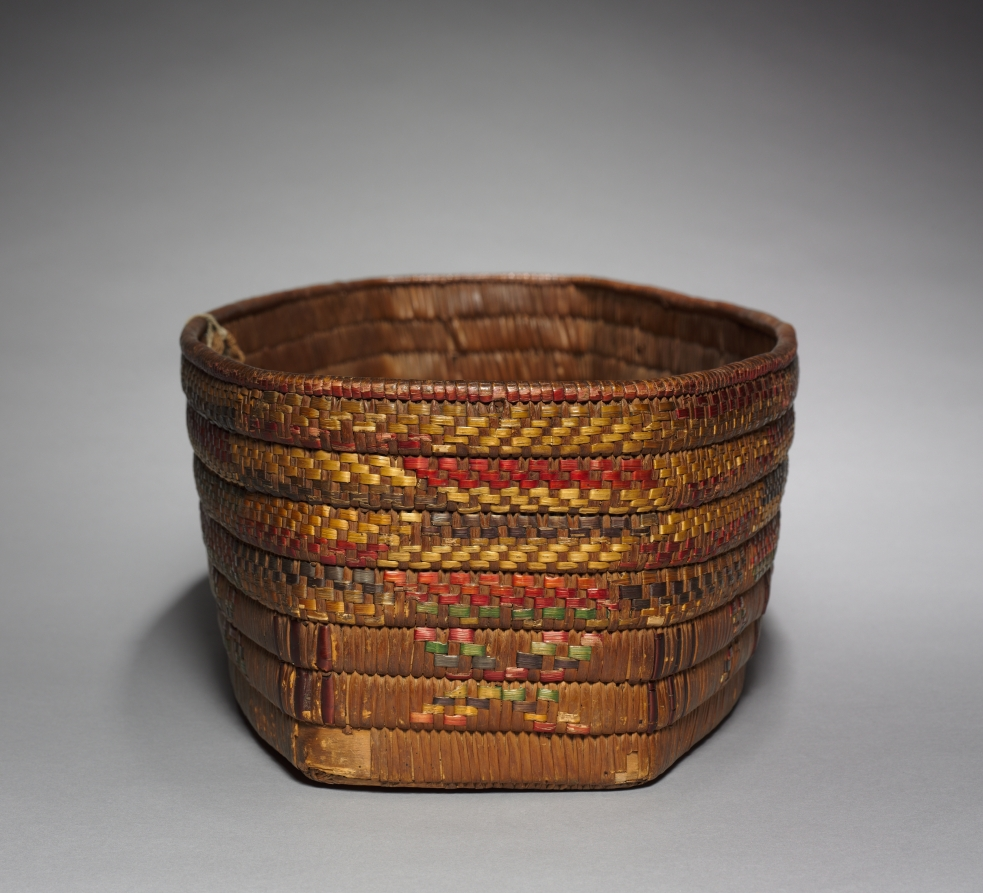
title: Baby Basket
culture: Northwest Coast, Frazer River, Salish, Late 19th century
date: c 1875– 1910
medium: basketry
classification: Basketry